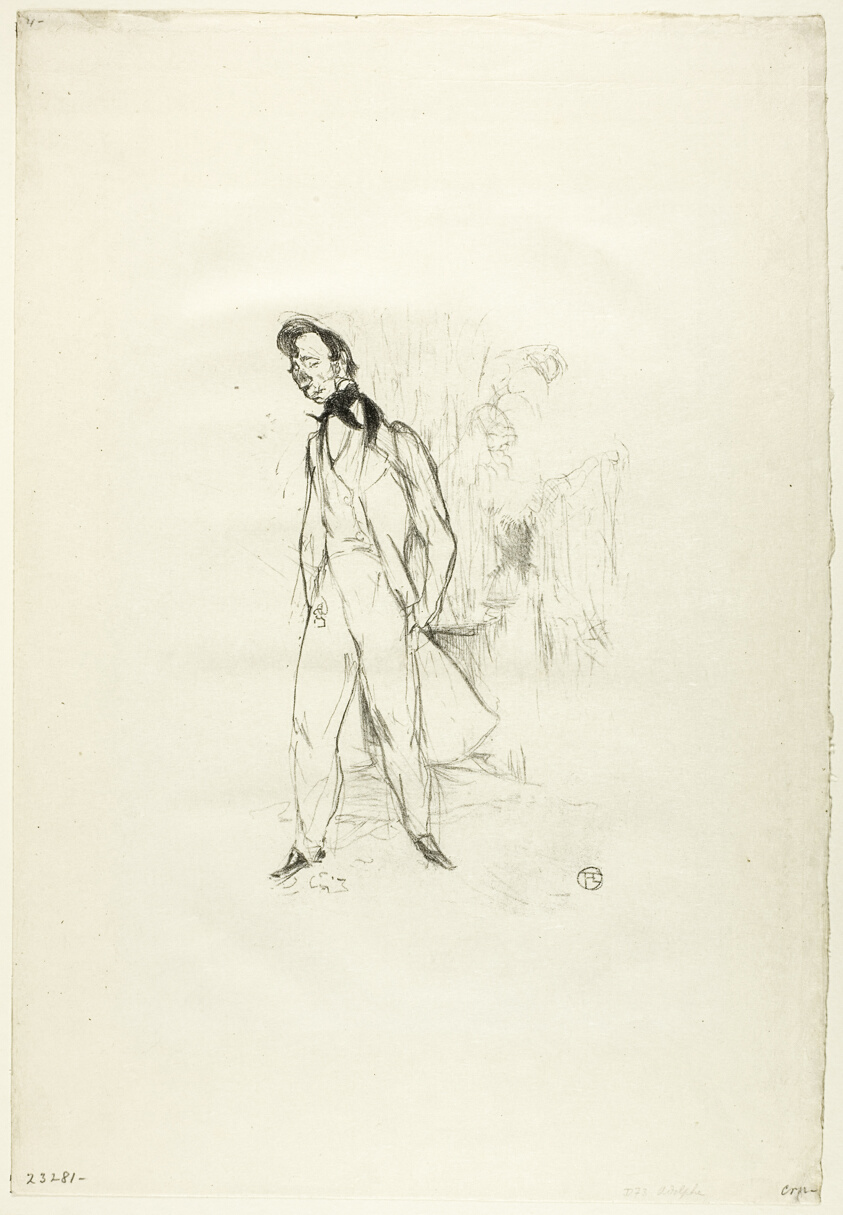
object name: Print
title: Adolphe ou Le Jeune Homme Triste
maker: Henri de Toulouse-Lautrec (French, 1864-1901)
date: 1894, published before 1910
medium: Lithograph on cream wove paper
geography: France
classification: lithograph; print; prints and drawing